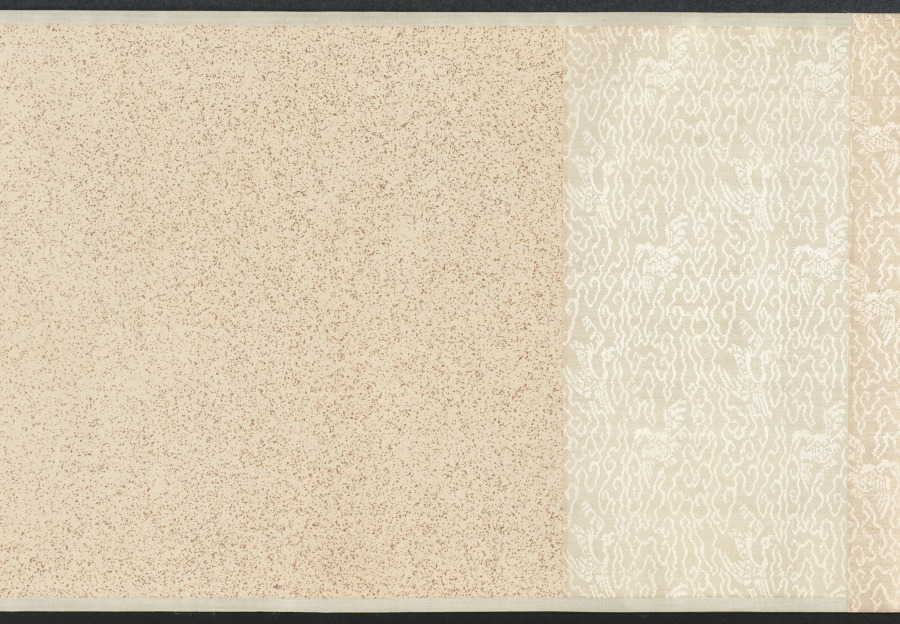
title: Nine Songs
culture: China, Yuan dynasty (1271-1368)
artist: Zhang Wo (Chinese, active c.1336–after 1364)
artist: Chu Huan (Chinese, active 1361)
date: 1361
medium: handscroll; ink on paper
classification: Painting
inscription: 7 colophons and 47 seals: 1 colophon, dated 1361, and 28 seals of Chu Huan 褚奐 (active c. 1361); 1 colophon, dated 1785, and 1 seal of Lu Shihua 陸時化 (1714-1779); 2 seals of Lu Yü-ch'ing (18th c.); 1 colophon, dated 1935, of Ye Gongchuo 葉恭綽 (1881-1968); 1 colophon, dated 1935, of Wu Hufan 吳湖帆(1894–1968); 1 colophon, dated 1938, and 1 seal of Wang Tongyu 王同愈 (1856-1941); 1 colophon, dated 1941, of Wu Huayuan 吳華源 (1893-1972); 1 colophon, dated 1942, and 9 seals of Xu Bangda 徐邦達 (1911–2012); 1 colophon, dated 1942, of Lang Jingshan 郎靜山 (1892-1995); 1 colophon, dated 1944, of Tang Yun 唐雲 (1910-1993); 6 seals of Wang Jiqian [C.C. Wang] 王季遷 (1907–2003).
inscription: Text of The Nine Songs written by Chu Huan at the end of each section.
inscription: 右離騷九歌圖，宋龍溟居士李公本，淮南張渥叔厚所畫妙絕當世。家藏請予書其辭目識于左。至正二十一年辛醜三月旦河南褚奐記。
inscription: Colophon by Lu Shihua 陸時化 (1714–1789): This scroll is fortunate to have been handed down from collections of the right people. Now, after 500 years, its condition is as good as when it was painted. I acquired this from Mr. Shen Guiyu [1673-1769], the President of the Board of Rites. The label is in his handwriting when he was 95 years old. I submit that Chu Huan (t. Shiwen) of the Yuan Dynasty was a native of Qiantang. His "seal" and li writings are in the style of Wu Rui. For example, in [Chu Kuei's] Ming ji lu [A list of masterpieces] is recorded the stele commemorating the restoration of the prefectural school of Kun-shan, the text of which was composed by Yang Weizhen in the twenty-first year of Zhizheng [1361]; and the calligraphy as well as the title in li style was by Chu Huan, who was at that time an assistant judge of the prefecture of Haining in the circuit of Hangzhou. Zhang Wo's zi is Shuhou (叔厚). His literary name is Zhen Qisheng (贞期生). According to [Gu Ying's] Yu shan cao tang ya jii, he liked to paint in the bai-miao or the "pure delineation" style after the method of Li Longmian [Li Gonglin 李公麟], which finds no peer among the ancient masters. This is agreed upon [by Pei Ch'iung] in his Qing jiang zhi who praised [Zhang Wo] as being quite learned and well-versed in many branches of the arts, especially figure painting. Recorded by Lu Shihua [The mountain dweller], listening to the pine, in the twelfth month of the yisi year [1785].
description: Painted in the baimiao, or fine-line drawing style, this ancient work demonstrates the literati’s use of abstract calligraphic brushwork for self-expression. The subject of the “Nine Songs”—songs associated with shamanistic rituals in the ancient Chu kingdom—had traditionally provided artists with myths and legends that they could explore and reinterpret in their own works.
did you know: Divided into eleven sections, the scroll contains illustrations by painter Zhang Wu followed by a transcription of the relevant verse by calligrapher Chu Huan.